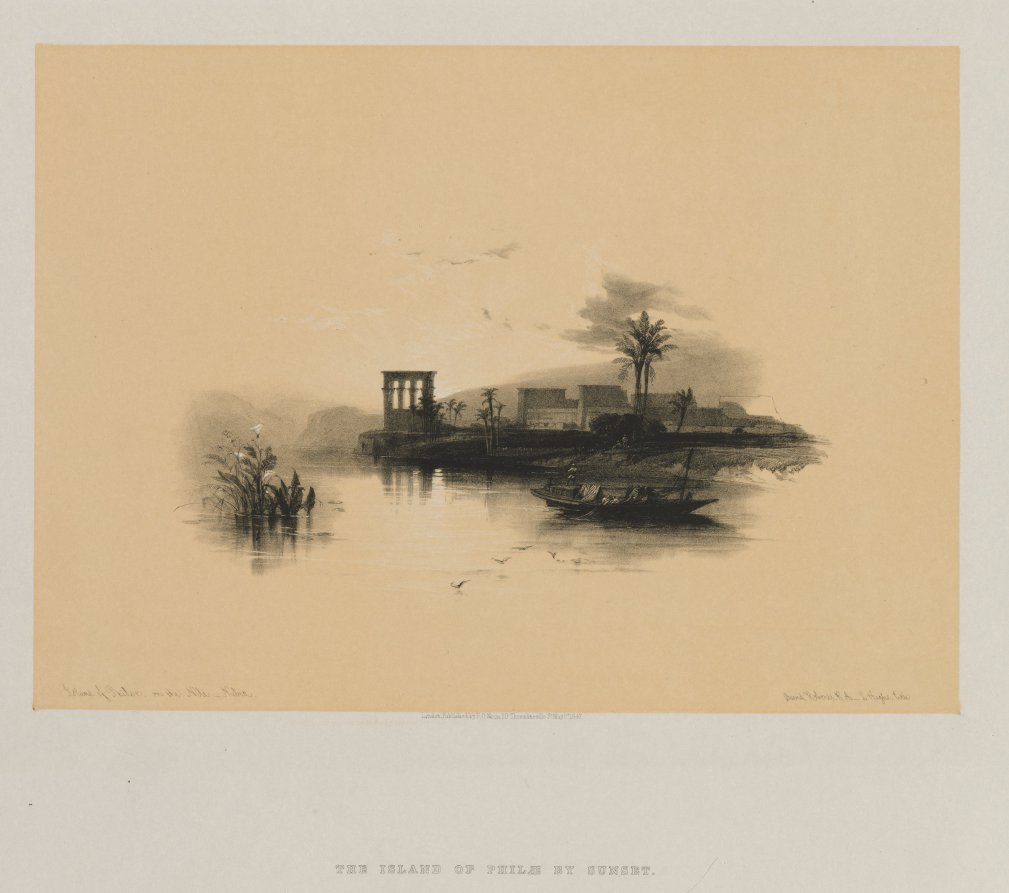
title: Egypt and Nubia, Volume II: Island of Philae, on the Nile, Nubia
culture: England, 19th century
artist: Louis Haghe (British, 1806–1885)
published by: F. G. Moon, 20 Threadneedle Street, London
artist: after David Roberts (Scottish, 1796–1864)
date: 1847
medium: color lithograph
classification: Print